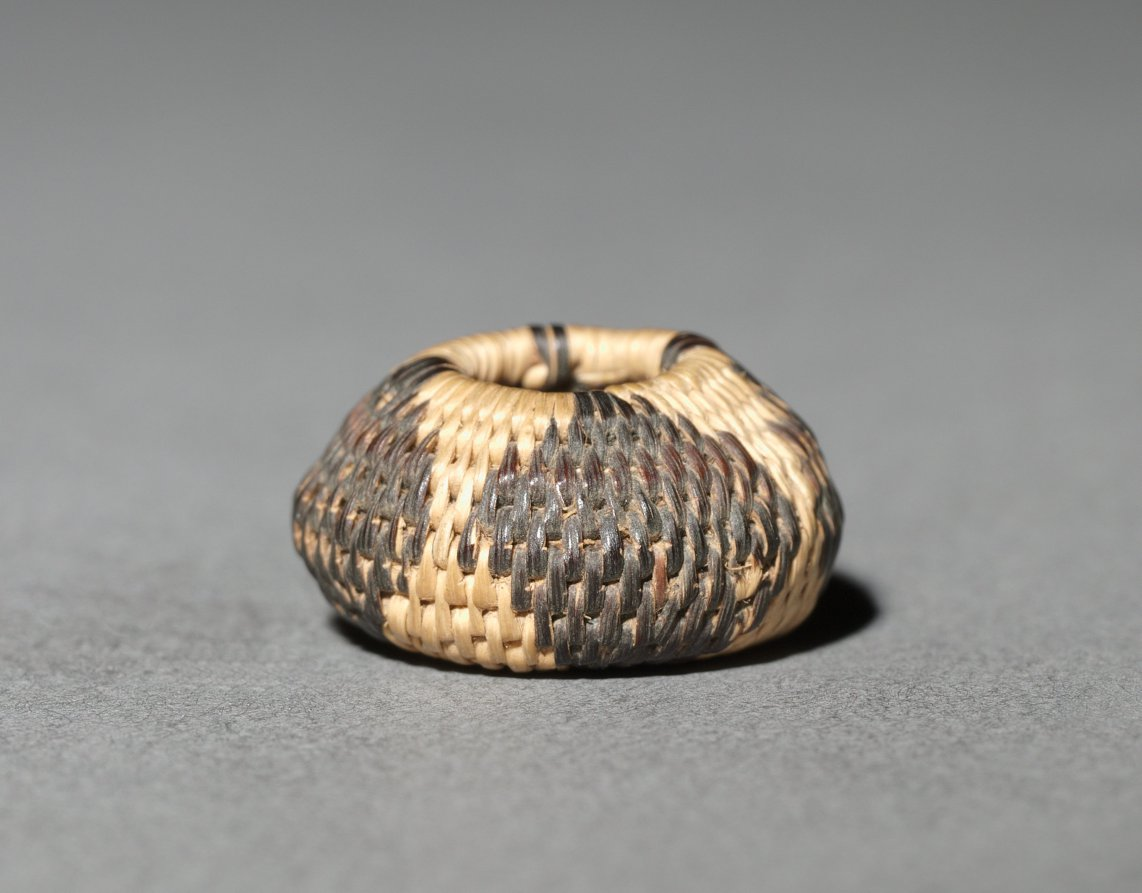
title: Miniature Basket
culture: America, Native North American, Southwest, Arizona, Akimel O'odham (Pima), Unassigned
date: before 1923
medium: plant fiber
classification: Basketry